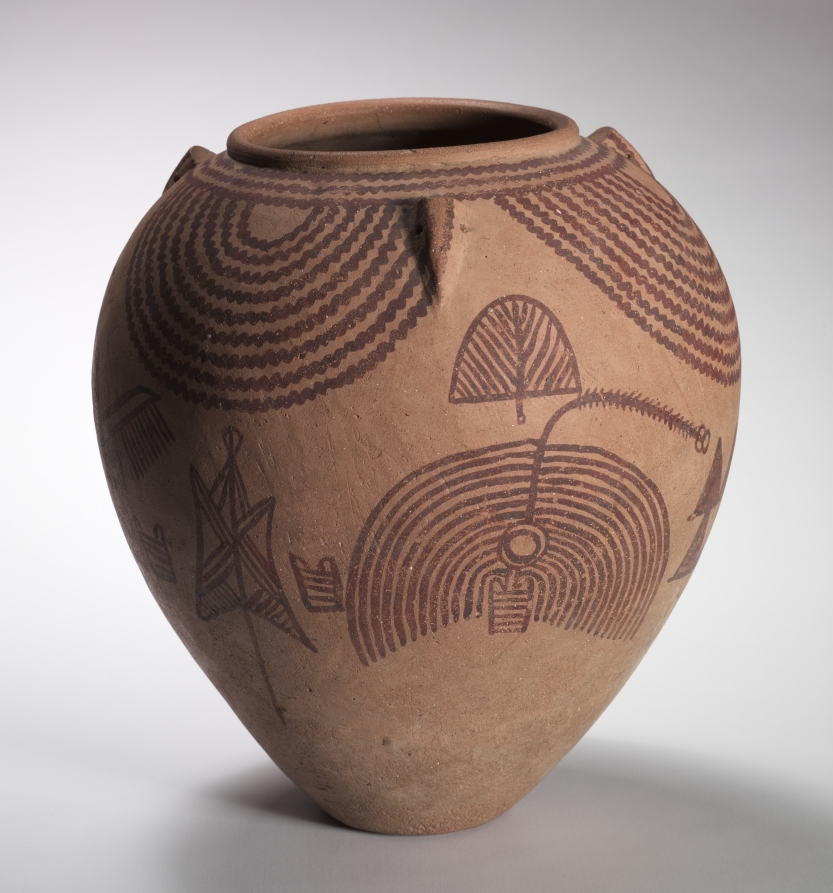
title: Decorated Jar with Boat Scenes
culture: Egypt, Predynastic (5000–2950 BCE), Naqada IIc–d (3650–3300 BCE)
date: c. 3300–3100 BCE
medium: marl clay pottery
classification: Vessels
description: The decoration painted on this jar shows two multi-oared boats traveling through fertile riverbanks lined with trees and aloe bushes. Rows of triangles indicate the desert hills in the background. The Nile was Egypt’s primary means of transportation and communication, since river traffic was far more efficient than travel by land. The concept of boat travel permeated all aspects of Egyptian life and religion. The sun god Ra was believed to travel by boat across the heavens by day and through the underworld by night. Funerary texts describe the trip to the afterlife as a journey by boat, and scenes of boats figured prominently in tomb decoration.